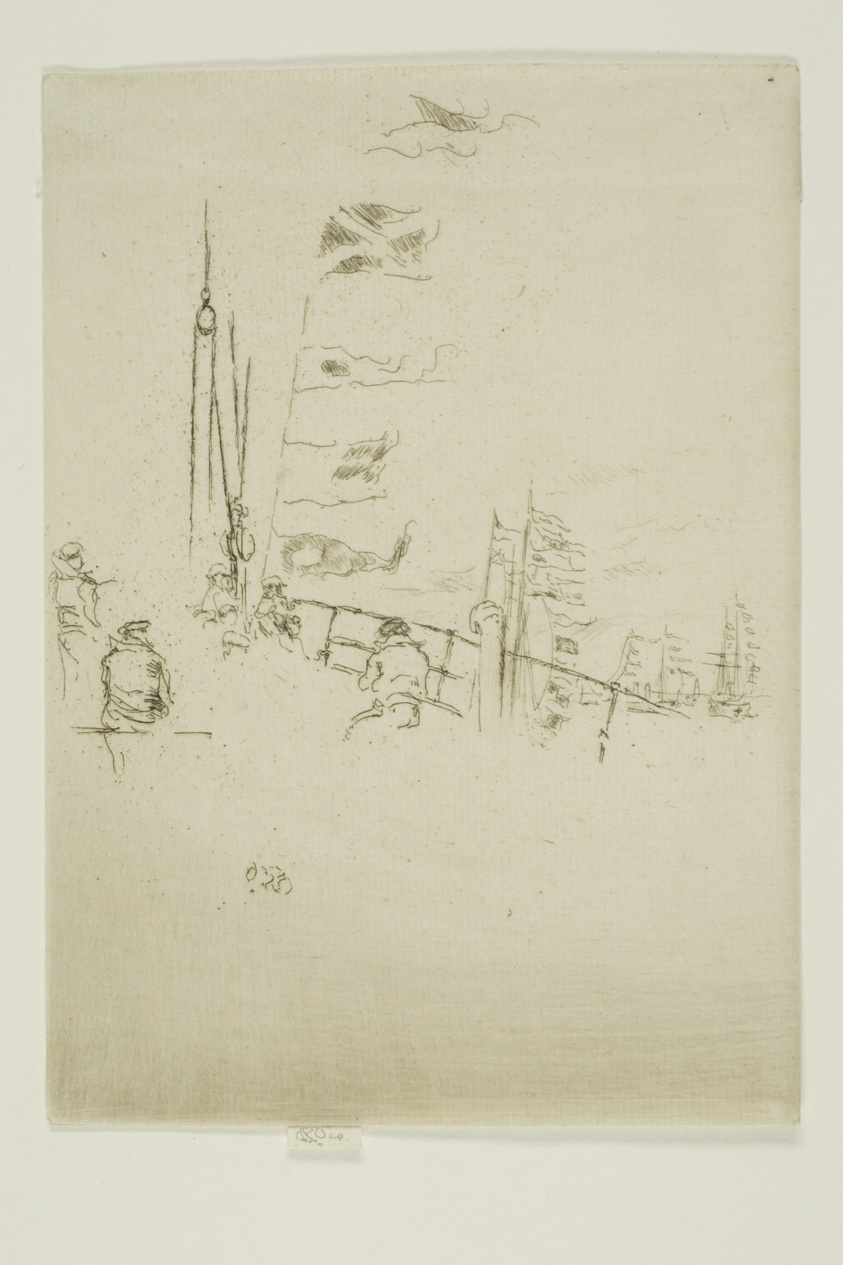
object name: Print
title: Bunting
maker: James McNeill Whistler (American, 1834-1903)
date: 1887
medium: Etching and drypoint with foul biting in black ink on cream laid paper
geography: United States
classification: etching; foul biting; print; prints and drawing; drypoint; paper